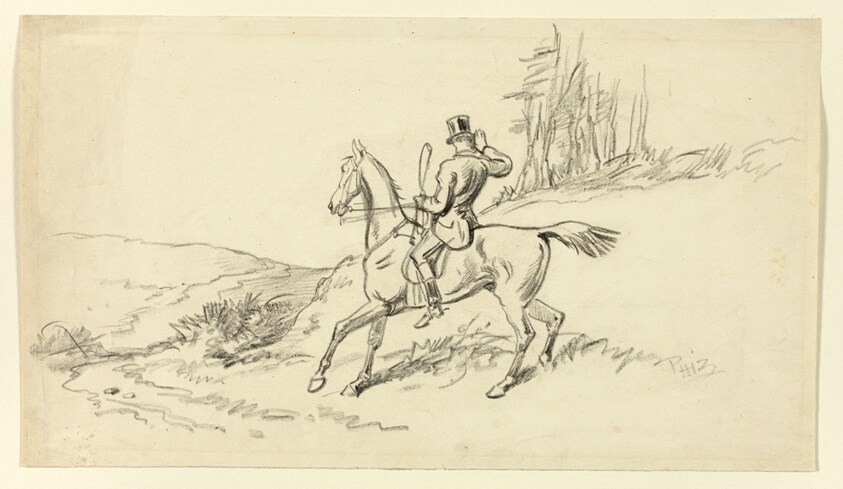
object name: Drawing and Watercolor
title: Rider Reining in Horse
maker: Hablot Knight Browne (English, 1815-1882)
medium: Black crayon on cream wove paper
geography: England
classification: crayon; drawings (visual works); prints and drawing